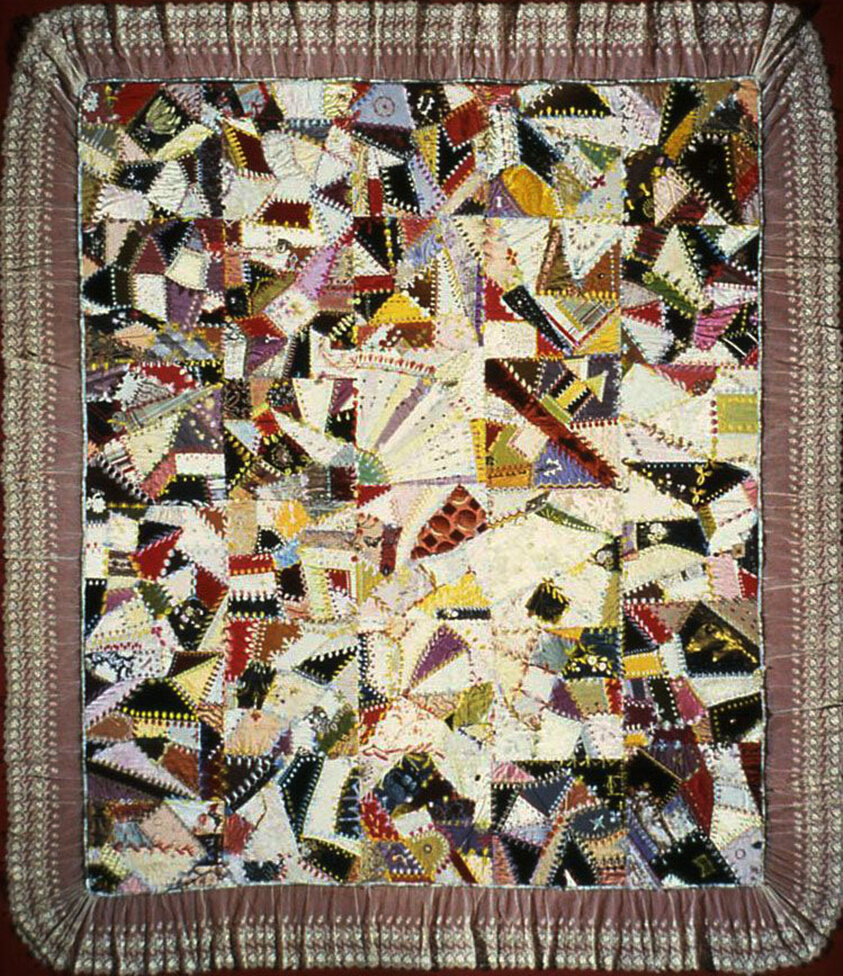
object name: Textile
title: Bedcover (Crazy Quilt)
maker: United States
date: 1880/85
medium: Silk, cotton, and wool, pieced plain, twill, and satin weaves; some with velvet, some with patterning and brocading wefts, and some self-patterned; some printed / painted; some watered (moiré); embroidered with silk, cotton, gilt-and-silvered-metal-strip-wrapped cotton and silk, and copper-metal-strip-wrapped wool in back, individual back, chain, detached chain, eyelet, feather, herringbone, overcast, satin, surface satin, single, stem stitches; laid work and couching; embellished and appliquéd with gilt and silver metal and gelatin paillettes, lacquered paper, glass, ceramic, and metal beads, pearls, silk ribbons, leather, and machine embroidered motifs; edged with silk chenille and cotton, machine-made net; cut work embroidered in overcast and satin stitches; backed wtih silk, plain weave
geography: United States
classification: textile; needlework - quilt